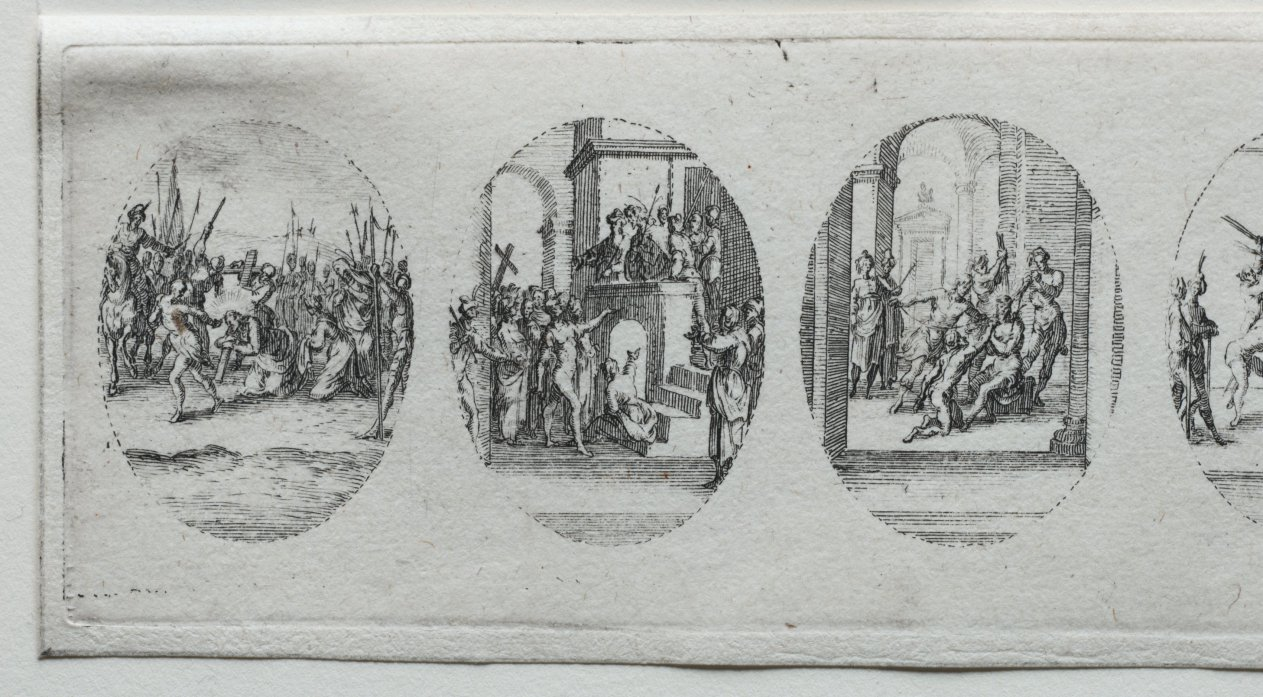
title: The Mysteries of the Passion: The Carrying of the Cross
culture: France, 17th century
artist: Jacques Callot (French, 1592–1635)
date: 1631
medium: etching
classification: Print